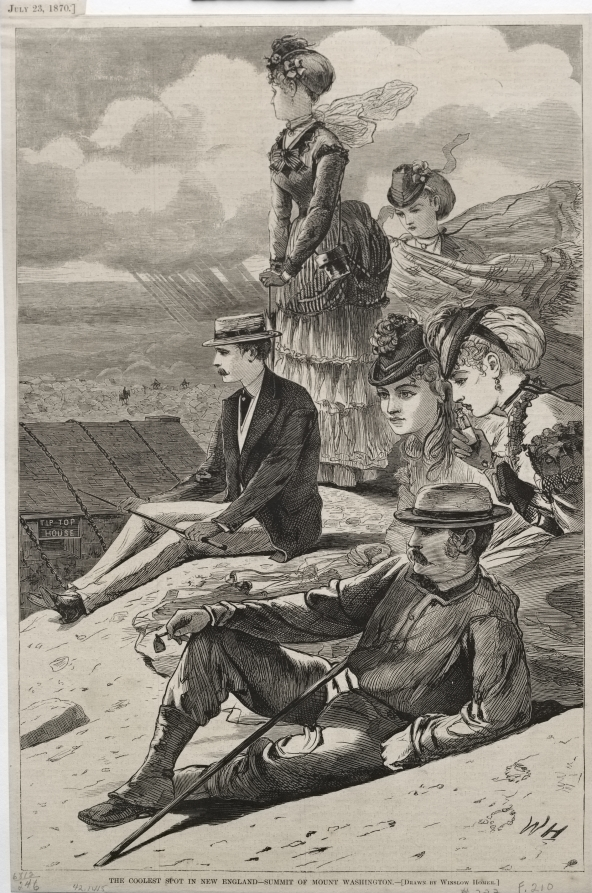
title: The Coolest Spot in New England - Summit of Mount Washington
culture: America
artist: Winslow Homer (American, 1836–1910)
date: 1870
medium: wood engraving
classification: Print